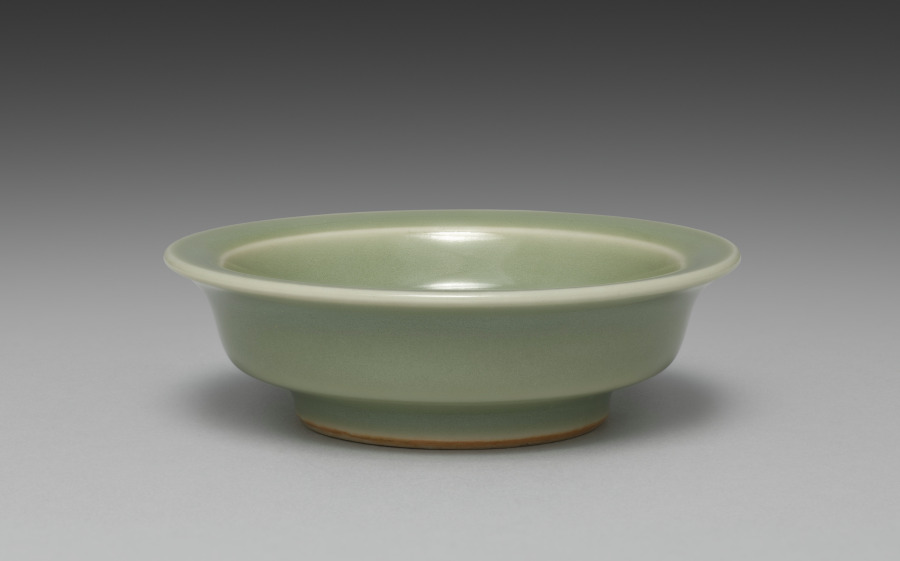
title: Saucer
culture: Japan, Meiji period (1868–1912)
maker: Seifū Yohei III (Japanese, 1851–1914)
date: 1893–1914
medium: One from a set of ten dishes; porcelain with green glaze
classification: Ceramic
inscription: 清風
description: Yohei III’s main output for his sophisticated clientele was in the form of tea sets and dining sets. He created a range of dishes in green glazes. He often produced in pairs, sets of five, or sets of ten. For this set of ten small dishes in a simple, round form that emphasizes the glaze above all, the box lid designates the piece as seiji, or green-glazed porcelain, using a general term for the extensive palette of green glazes often called celadon in English. The box lid further identifies the dishes themselves as tōchō, literally “bean-sized saucers,” a size that makes them suitable for dipping sauces.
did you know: The ten dishes in this set are stored in stacks of five in a two-compartment box.